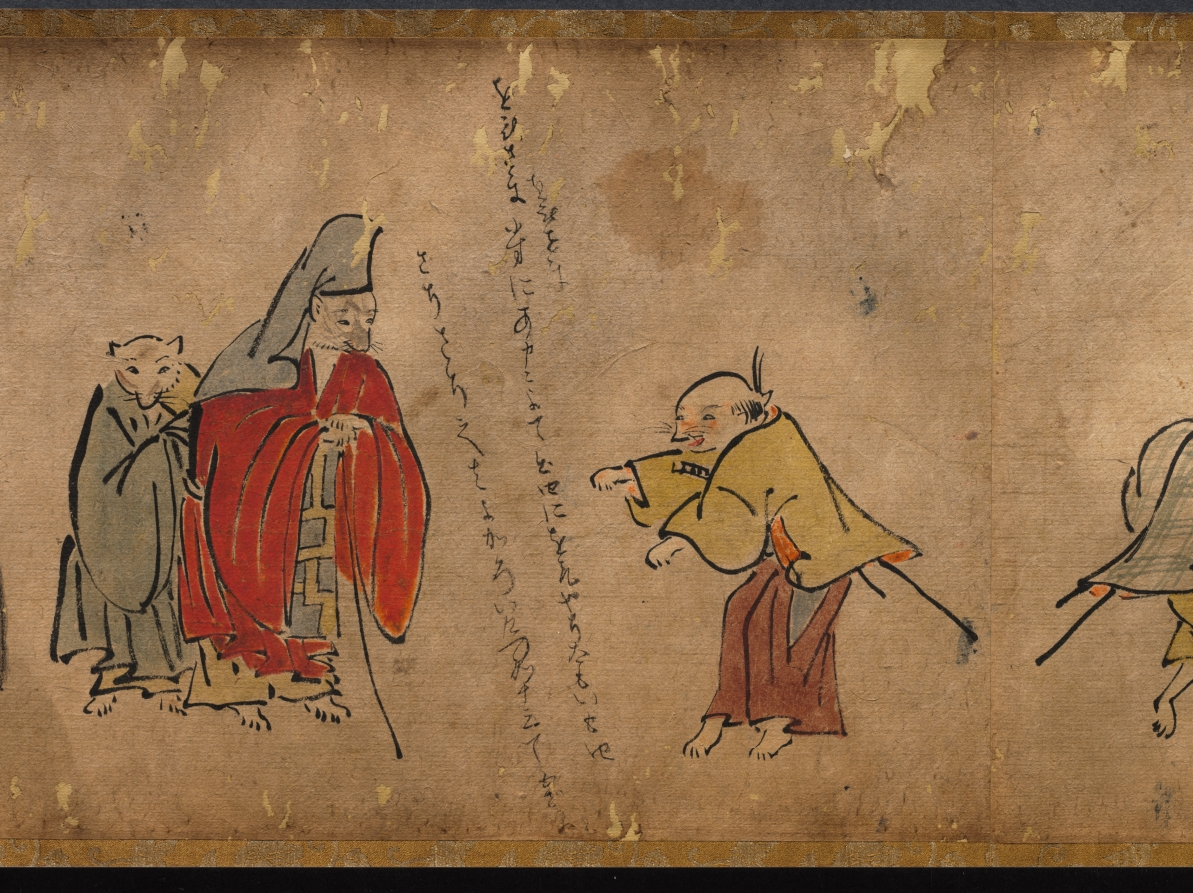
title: The Illustrated Tale of Oishi Hyōroku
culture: Japan, Edo period (1615–1868)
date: 1700s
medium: handscroll; ink and color on paper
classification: Painting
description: This incomplete handscroll illustrates part of the story of Oishi Hyoroku, a young man tasked with battling fox apparitions who were creating problems in his town. In other extant versions of the scroll, the story is set in the fall of 1624 in Kagoshima in southern Japan. Throughout the story, Hyoroku is tricked and terrified by the foxes that shift their shapes into a variety of monstrous phantoms. After repeated humiliations, he eventually captures two of the foxes. In this version, colloquial texts that function like text blurbs in comics appear throughout the scroll, but the main text is missing.